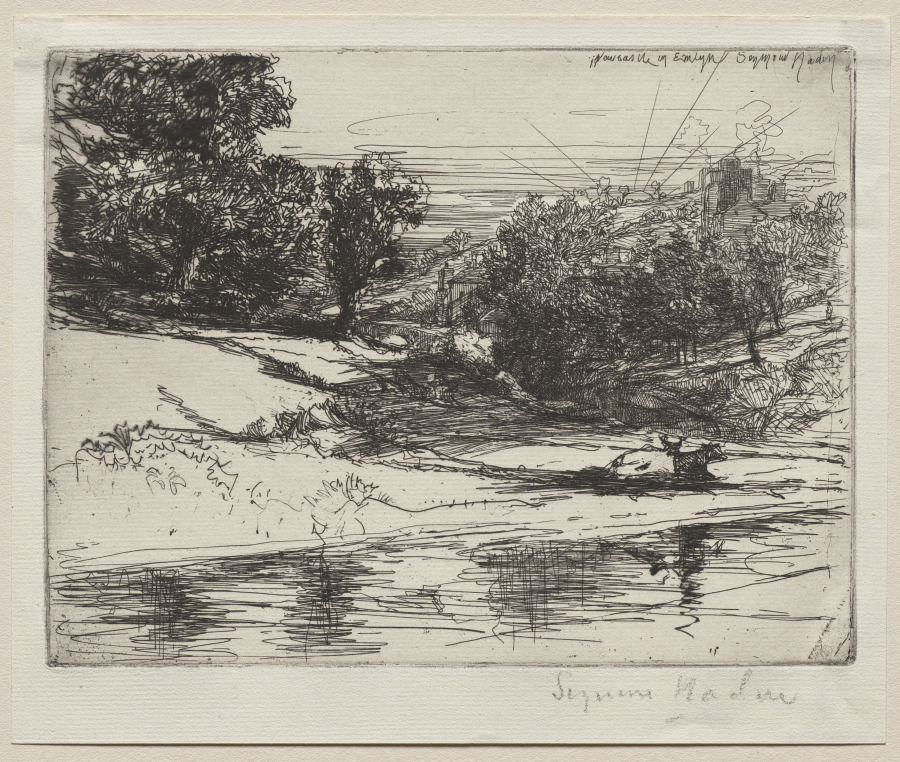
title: Newcastle in Emlyn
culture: England, 19th century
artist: Francis Seymour Haden (British, 1818–1910)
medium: etching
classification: Print